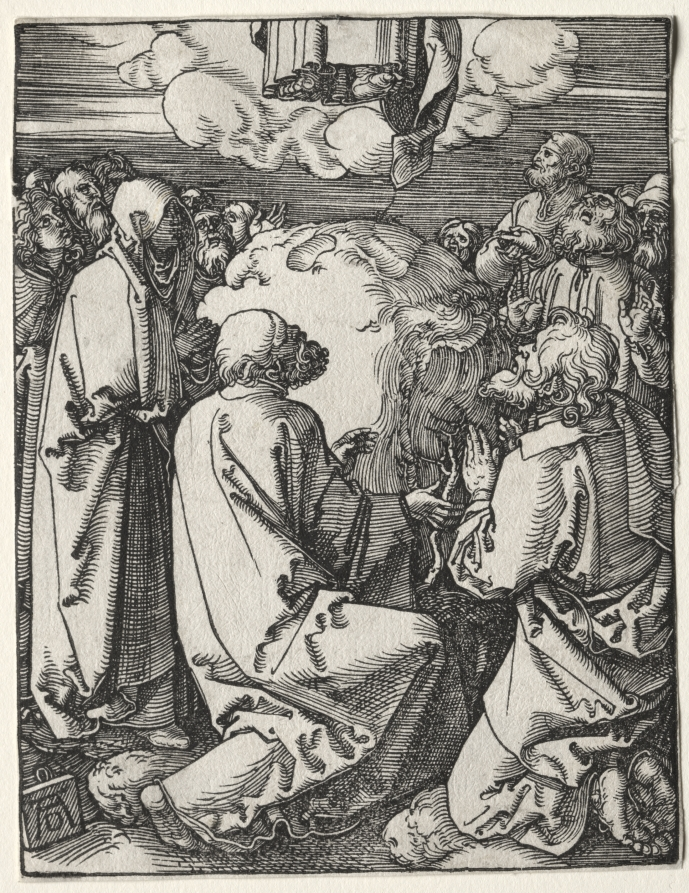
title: The Small Passion: The Ascension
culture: Germany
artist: Albrecht Dürer (German, 1471–1528)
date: 1509–1511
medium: woodcut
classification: Print